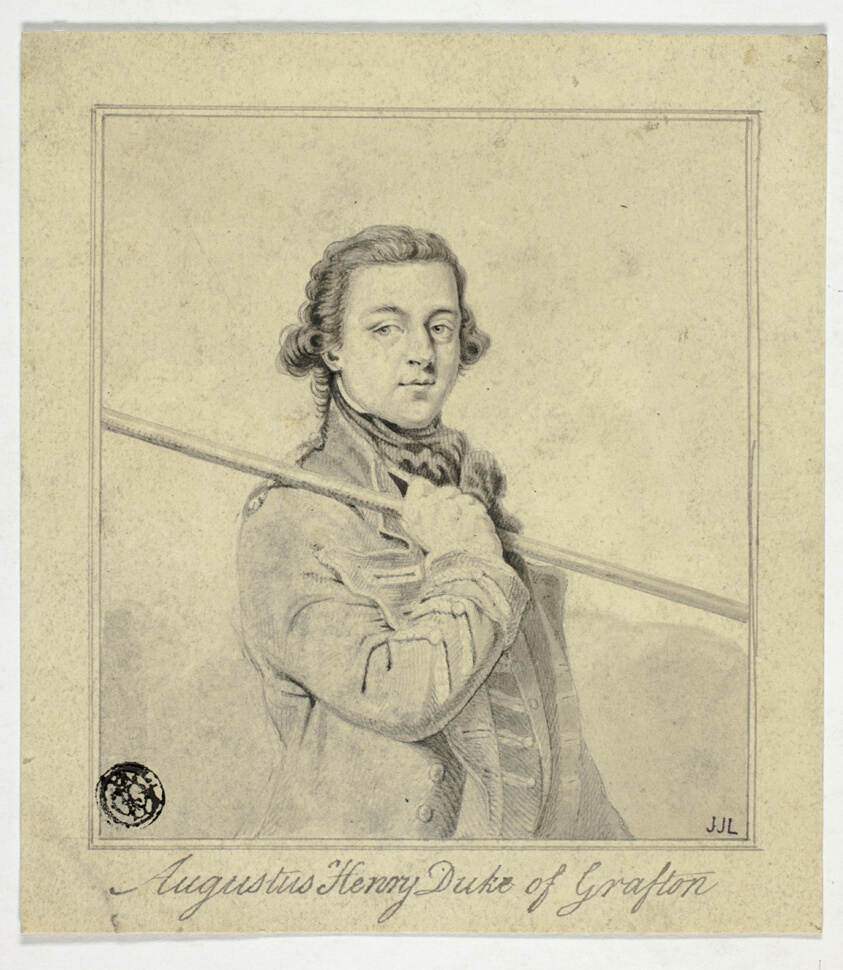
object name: Drawing and Watercolor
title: Augustus Henry, Duke of Grafton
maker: Attributed to George Perfect Harding; English, 1780-1853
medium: Graphite, with brush and gray wash, on cream wove paper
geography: England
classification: pen and ink drawings; drawings (visual works); prints and drawing